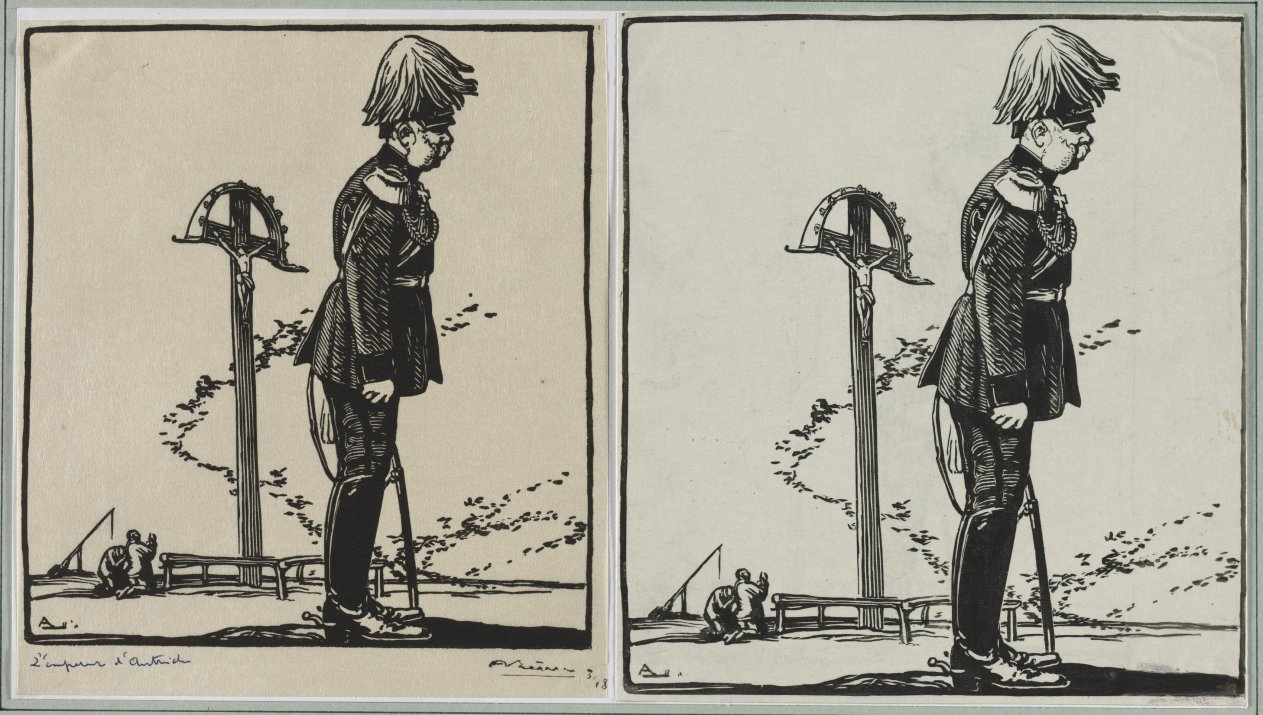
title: L'Empereur d'Autriche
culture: France, 20th century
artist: Auguste Louis Lepère (French, 1849–1918)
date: 1914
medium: woodcut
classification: Print